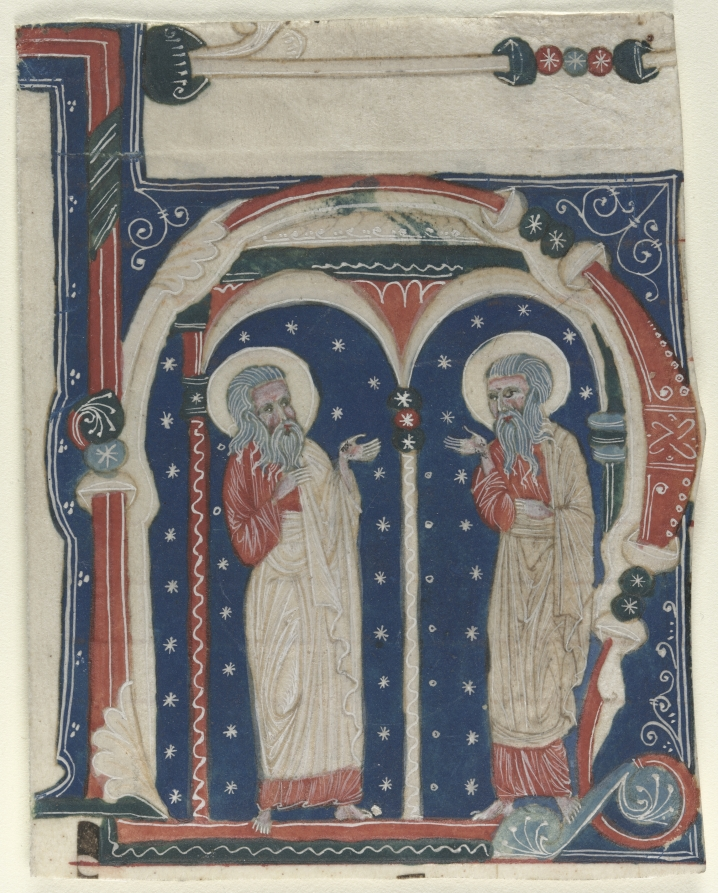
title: Historiated Initial (H) Excised from an Antiphonary: SS. Paul the Hermit and Anthony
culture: Italy, (Naples?), 13th century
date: c. 1200–1230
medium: ink and tempera on parchment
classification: Manuscript